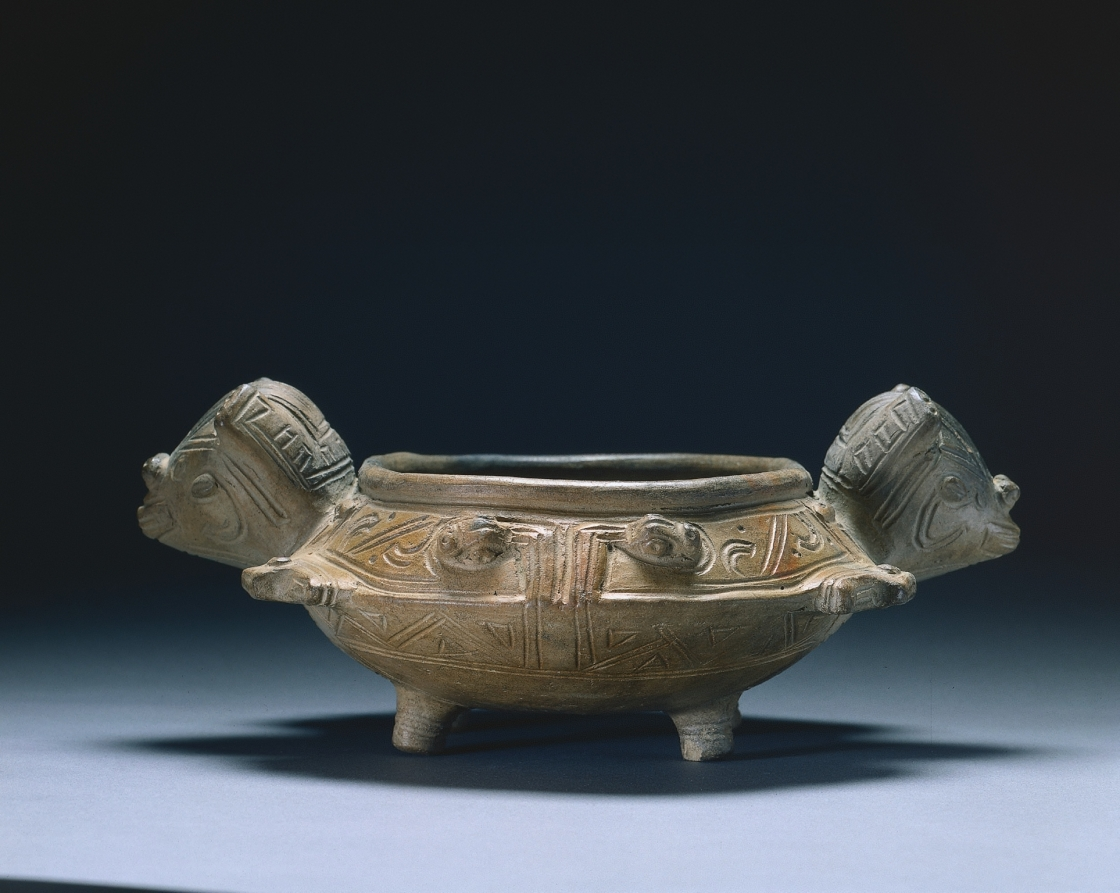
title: Double-Bat Bowl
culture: Colombia, Tairona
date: c. 900–1550 (thermoluminescence date, 810–1310)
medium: earthenware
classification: Ceramic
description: The archaeological Tairona civilization of mountainous northern Colombia is believed to be ancestral to the contemporary Kogi indigenous group. Ancient Tairona sites are terraced, and characterized by circular stone building foundations. The most famous form of Tairona art is gold jewelry, especially lost-wax cast figurines of chiefs, and anthropomorphic bats and birds. Tairona ceramics are less well known. This bowl has two protruding bat heads and four legs. The incurved sides of the bowl to either side of each head represents the bats' wings. The vessel's surface is decorated with raised serpents, as well as incised and impressed patterns.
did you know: The Tairona civilization lived in the mountains of northern Colombia.